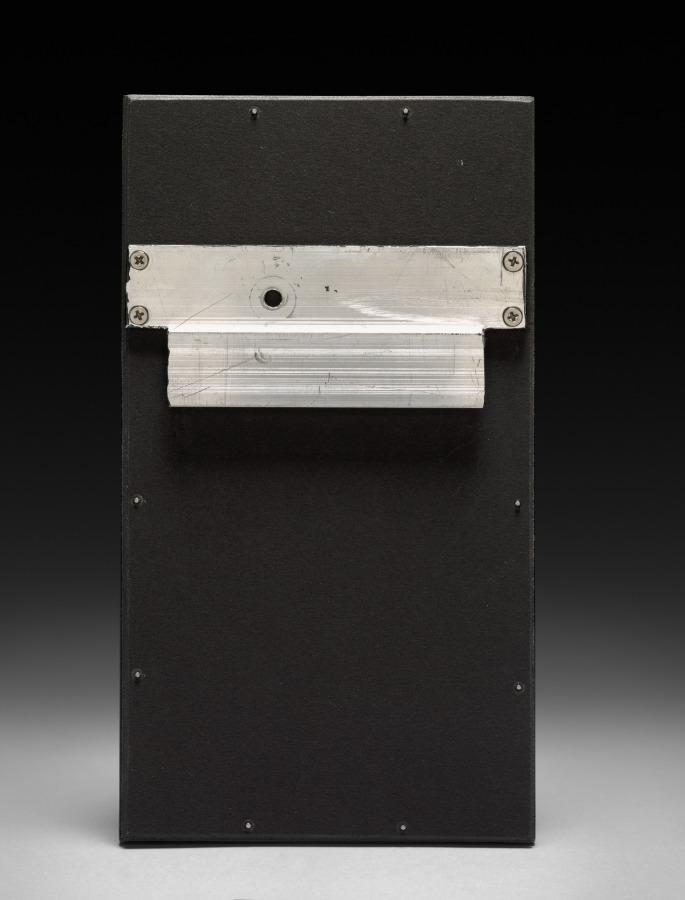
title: Plaque: The Crucifixion with Angels and Saints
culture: Northern Italy, Padua?, 15th century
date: c. 1400–1425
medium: verre églomisé (reverse gilded glass, engraved and painted)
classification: Glass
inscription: the letters on the banderoles may be described as a composite script called Gothic majuscule, which intermingles Roman capitals and uncial alphabets. This script was especially favored by Italian artists for inscriptions in architecture, sculpture, panel painting, and manuscript illustrations during the 14th and 15th centuries. The banderole on the left reads: "POSVIT. ME. DESOLAT.[UM]" (God has forsaken me); the other banderole reads: "CRUS. DOMINI. MECUM" (the cross of the Lord is with me). A third inscription with the abbreviations for the words of Pilate--"I. N. R. I." (IESUS, NASARENUS RES IUDAEORUM), or Jesus of Nazareth, the King of the Jews" appears on the plaque (tabula ansata) at the top of the cross.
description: Small glass plaques like this were often combined with plaques of painted wood and framed within elaborate architectural reliquaries or small altarpieces. The decorative technique, called verre églomisé, is a process in which the reverse side of a glass is gilded and then engraved with designs. The pelican, shown above the cross piercing its breast to feed its young, became a common symbol of Christ's sacrifice on the cross.